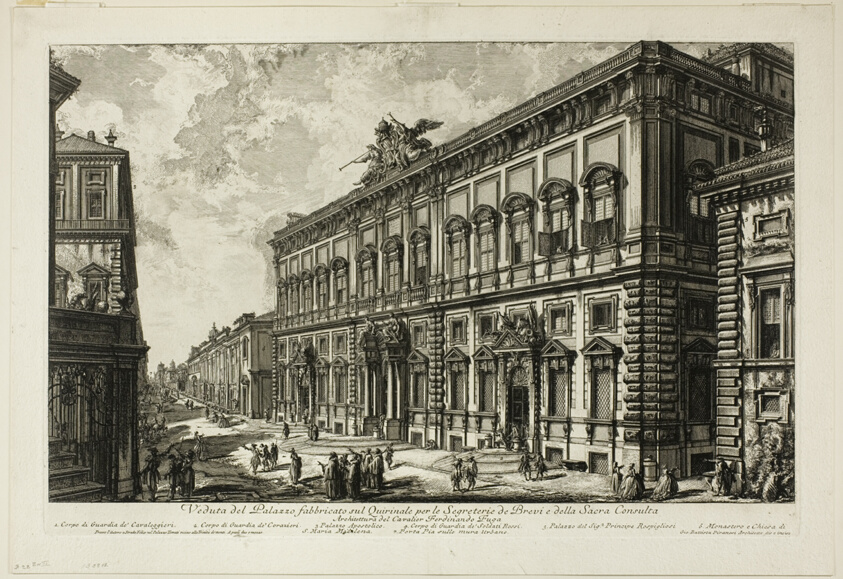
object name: Print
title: View of the Palazzo della Consulta on the Quirinal housing the Papal Secretariat, from Views of Rome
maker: Giovanni Battista Piranesi (Italian, 1720-1778)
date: 1750/59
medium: Etching on heavy ivory laid paper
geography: Italy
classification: etching; print; prints and drawing